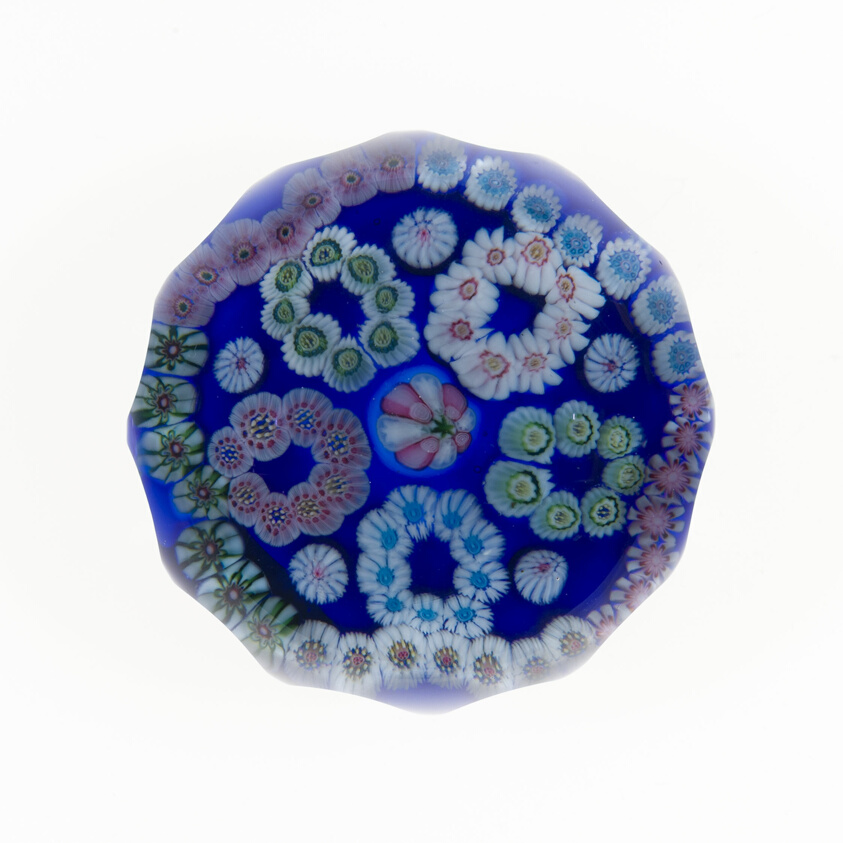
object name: Glass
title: Paperweight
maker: Clichy Glassworks (Cristalleries de Clichy); Clichy, France, 1837-1885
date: 19th century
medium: Glass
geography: Clichy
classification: paperweight; millefiori; european decorative arts; glass